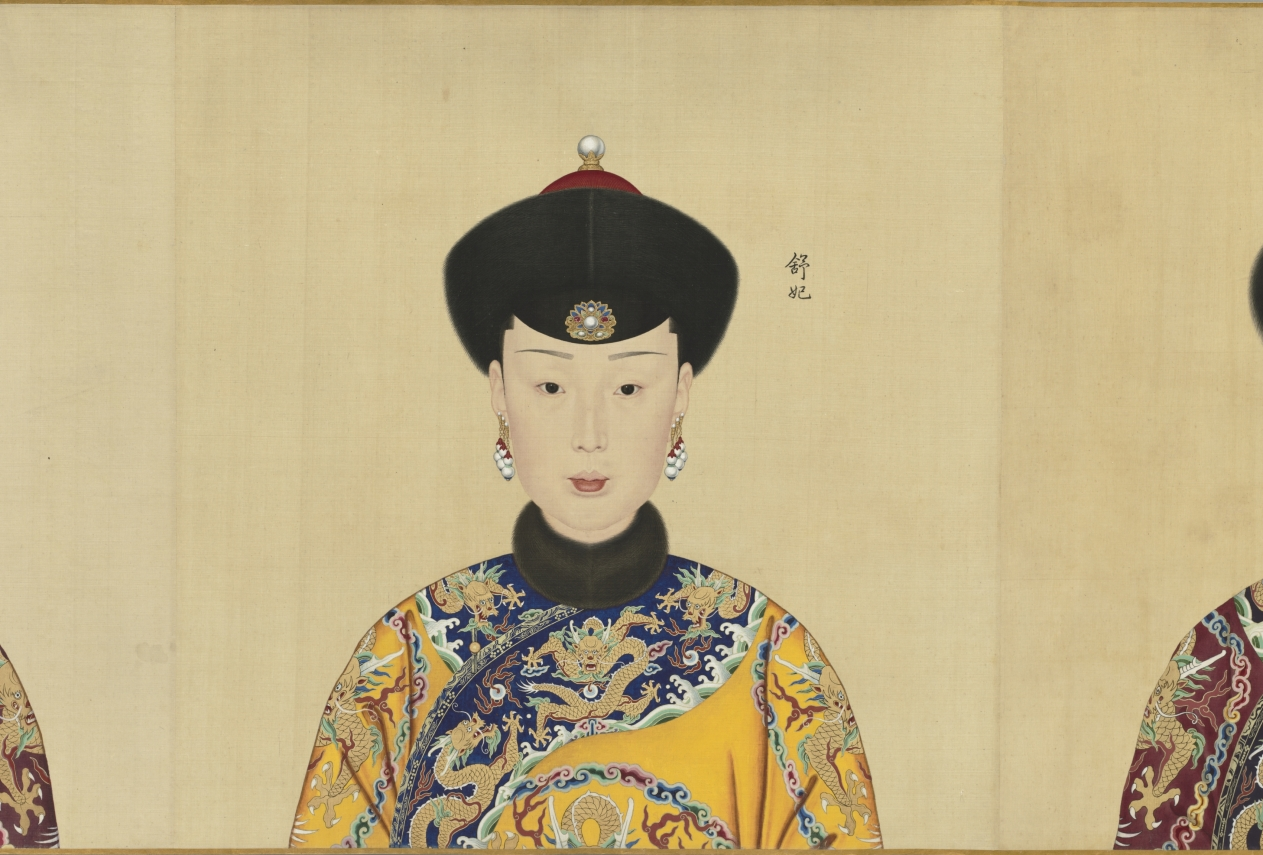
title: Portraits of the Qianlong Emperor and His Twelve Consorts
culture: China, Qing dynasty (1644–1911), Qianlong reign (1736–95)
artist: Giuseppe Castiglione (Italian, 1688–1766)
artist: and others (Chinese)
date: 1736–70s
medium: Handscroll; ink and color on silk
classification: Painting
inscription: 9 seals of the Qianlong emperor (r. 1736–95).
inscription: The eighth month, first year of Qianlong [1736] 乾隆元年八月吉日. The Empress (Xiaoxian) 皇后 (1712–1748), The Guifei (Huixian) 貴妃 (?-–1745), Chunfei 純妃 (1713–1760), Jiafei 嘉妃 (?–1755), Lingfei 令妃 (1727–1775), Shufei 舒妃 (1728–1777), Qingbin 慶嬪 (1724–1774), Yingbin 穎嬪 (1731–1800), Xinbin 忻嬪 (?–1764), Dunfei 惇妃 (1746–1806), Xunfei 順妃 (1749–1788), Shunbin 循嬪 (?–1797).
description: This portrait shows the Qianlong emperor at 26, in the first year of his reign. His likeness is followed by portraits of the empress and eleven consorts. Their portraits document the appearances of the court women around the time when they received their respective imperial titles, which occurred at different stages of the emperor's life. The first three portraits were done by the Jesuit (Roman Catholic) missionary artist Giuseppe Castiglione, whereas the later ones were by Chinese court painters. Formal portraiture contributed to the affirmation of status and construction of role and identity. This scroll served as both familial documentation and a "mind picture" of the Qianlong emperor, suggesting that his constructed image of emperorship was inseparable from concepts of self and family. It was stored in a carved red lacquer box bearing the original painting title Mind Picture of a Well-Governed and Tranquil Reign (see CMA 1969.32).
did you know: Lingfei 令妃 (1727–1775), the first consort depicted in the maroon or “incense-colored" 香色 robe, was the mother of six of Qianlong’s children, including the future Emperor Jiaqing.